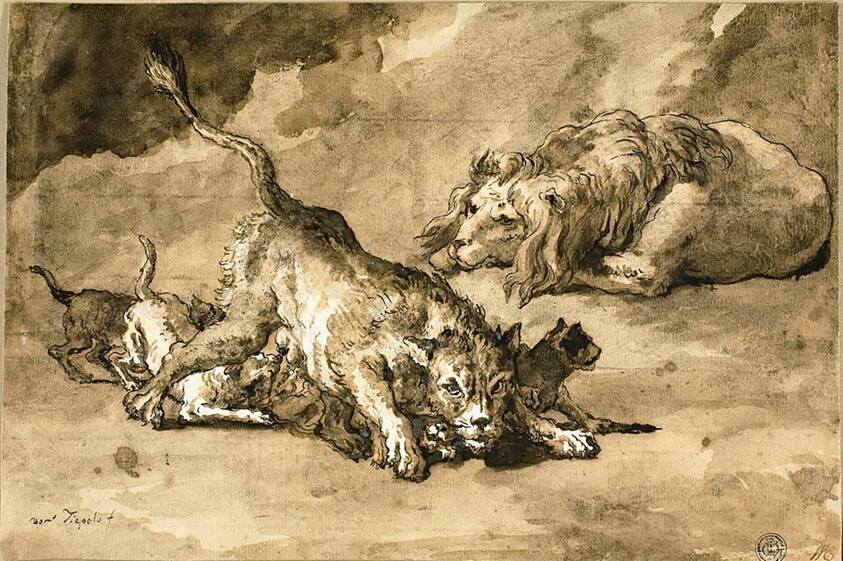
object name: Drawing and Watercolor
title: Lion, Lioness and Cubs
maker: Giovanni Domenico Tiepolo (Italian, 1727-1804)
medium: Pen and brown ink, and brush and brown wash, with traces of brown gouache, over black chalk, on ivory laid paper, laid down on blue wove paper, laid down on brown wove paper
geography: Italy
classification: ink or chalk wash; drawings (visual works); prints and drawing